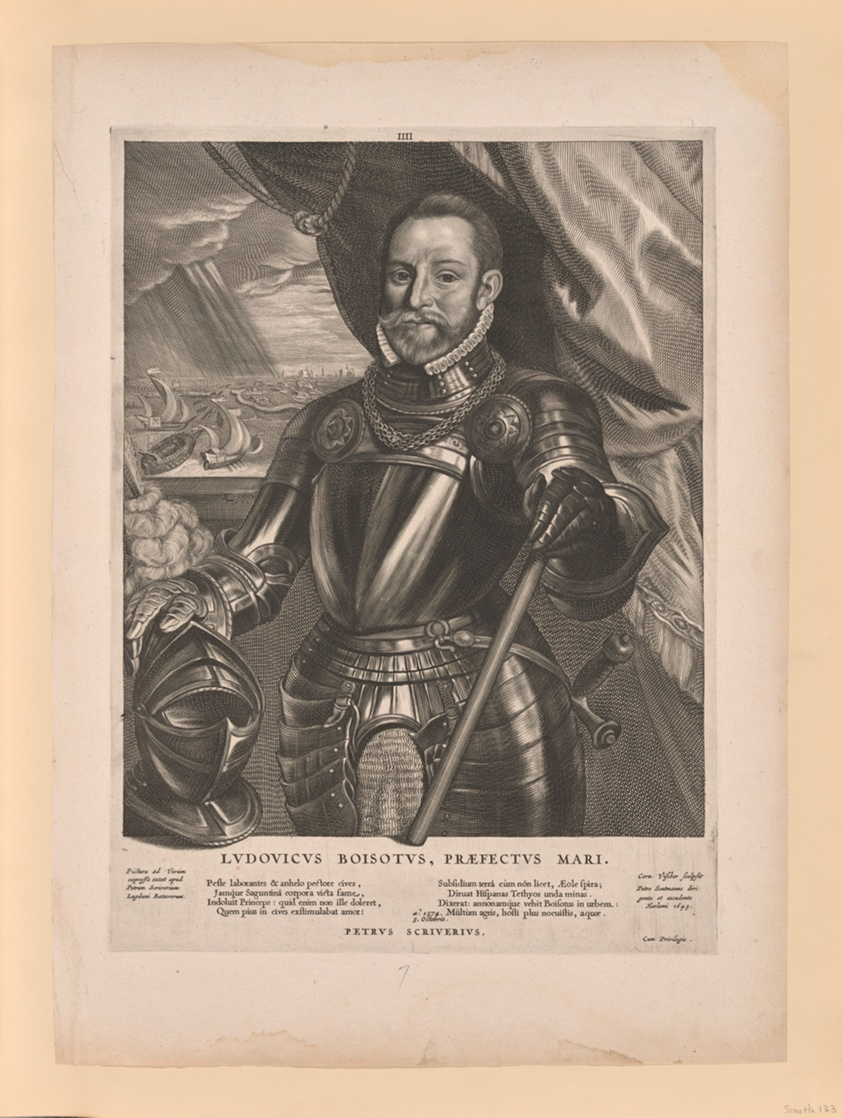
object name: Print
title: Lodewijk van Boisot, Admiral of Zeeland, from Quatuor Personae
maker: Cornelis Visscher (Dutch, c. 1629-1658); published by Pieter Claesz. Soutman (Dutch, c. 1580–1657)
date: 1649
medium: Engraving on paper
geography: Netherlands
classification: engraving; paper; print; prints and drawing